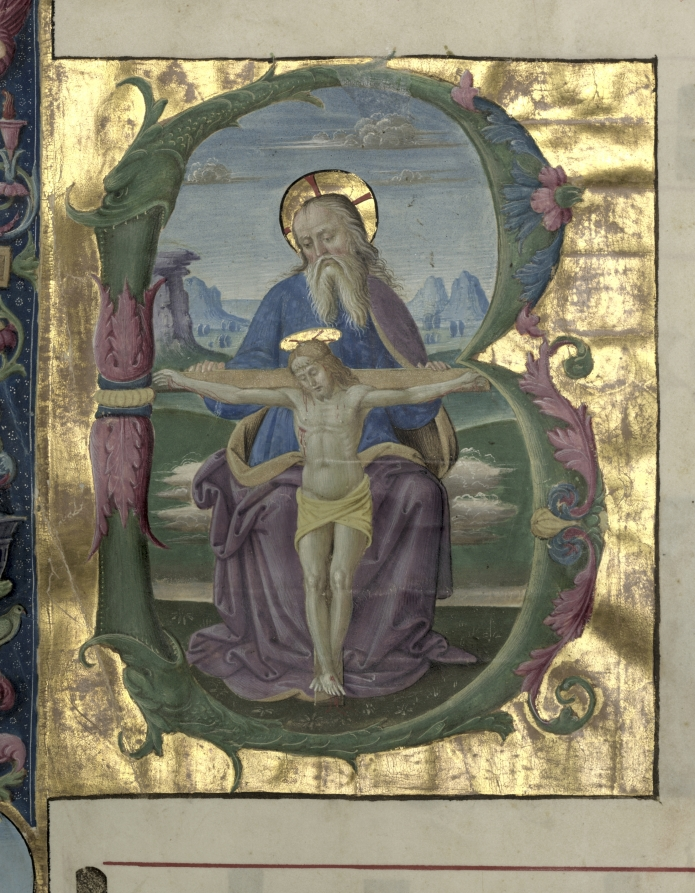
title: The Trinity: Leaf from a Gradual with Initial B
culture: Italy, Perugia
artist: circle of Perugino (Italian, c. 1450/55–1523)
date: c. 1496–1502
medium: ink, tempera, and gold on parchment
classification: Manuscript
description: The focus of this lavishly illuminated page is a large initial B containing a representation of the Holy Trinity (three persons in one godhead). The text, Benedicta sit sancta Trinitas, introduces the opening of the Introit for Mass on Trinity Sunday, celebrated one week after Pentecost. An illusion has been created by the artist who painted the framing initial to appear three-dimensional. Beyond the initial a landscape recedes as if viewed through an open window. The decoration extends into all four margins that are filled with small miniatures depicting saints (one was left blank). This page is a masterful example of Renaissance manuscript painting with classicizing leaf scrolls, masks, urns, putti, and other decorative motifs fashionable in Italy at the close of the 15th century. It may come from a set of choir books illuminated for Perugia Cathedral.